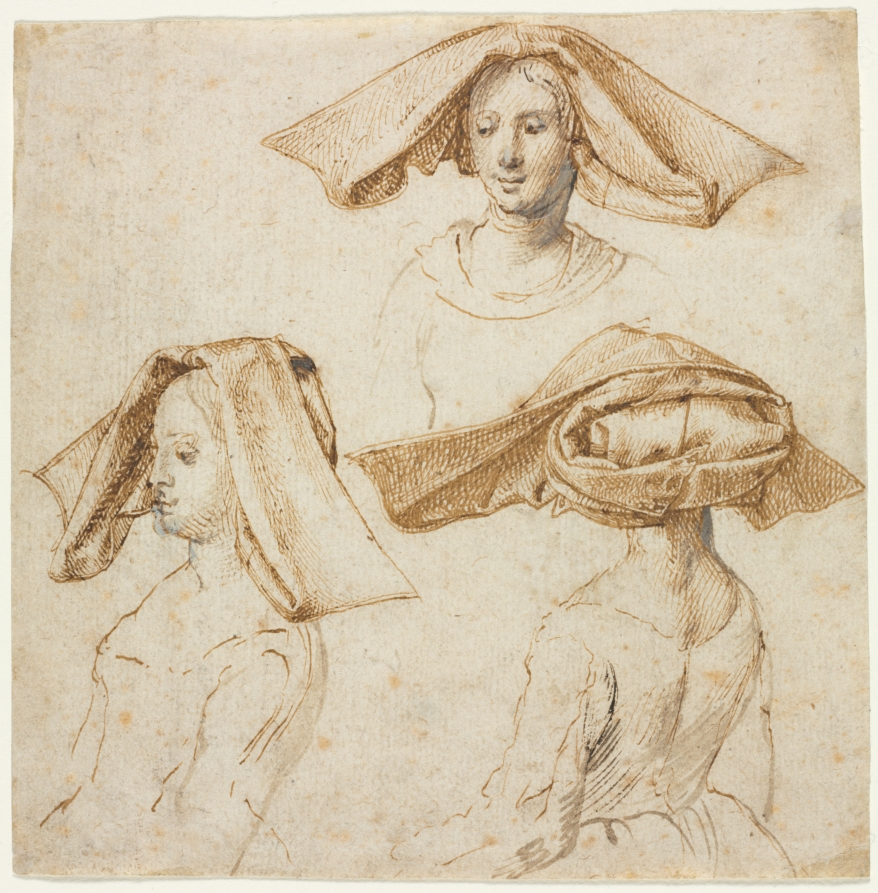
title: Three Studies of a Woman Wearing an Elaborate Headdress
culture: Netherlands(?), 16th century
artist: Anonymous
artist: retouched by Peter Paul Rubens (Flemish, 1577–1640)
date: c. 1500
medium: Pen and brown ink; retouched with brush and brown wash, lead white (partially oxidized)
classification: Drawing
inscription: VERSO, center, in graphite: Van Eyck [upside down] / [illegible] [upside down] ; lower right, in brown ink: R.P.R [upside down] (Lugt 2234)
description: This young woman’s long, conical hood is tucked under and pinned, with the front folded over to create wide, sloping flaps. Such headgear kept heat and cold away during outdoor labor, but around 1475, the style was adopted as a fashion statement by middle- and upper-class women, with the fabric starched for exaggerated effect. The drawing was likely made for a model book in an artist’s workshop of costume details for reference. More than 100 years later, the Antwerp artist Rubens acquired the drawing for his own model book and even drew over it.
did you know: In the 1600s, the artist Peter Paul Rubens made additions in ink wash and white paint to this c. 1500 drawing by an unknown Netherlandish artist.